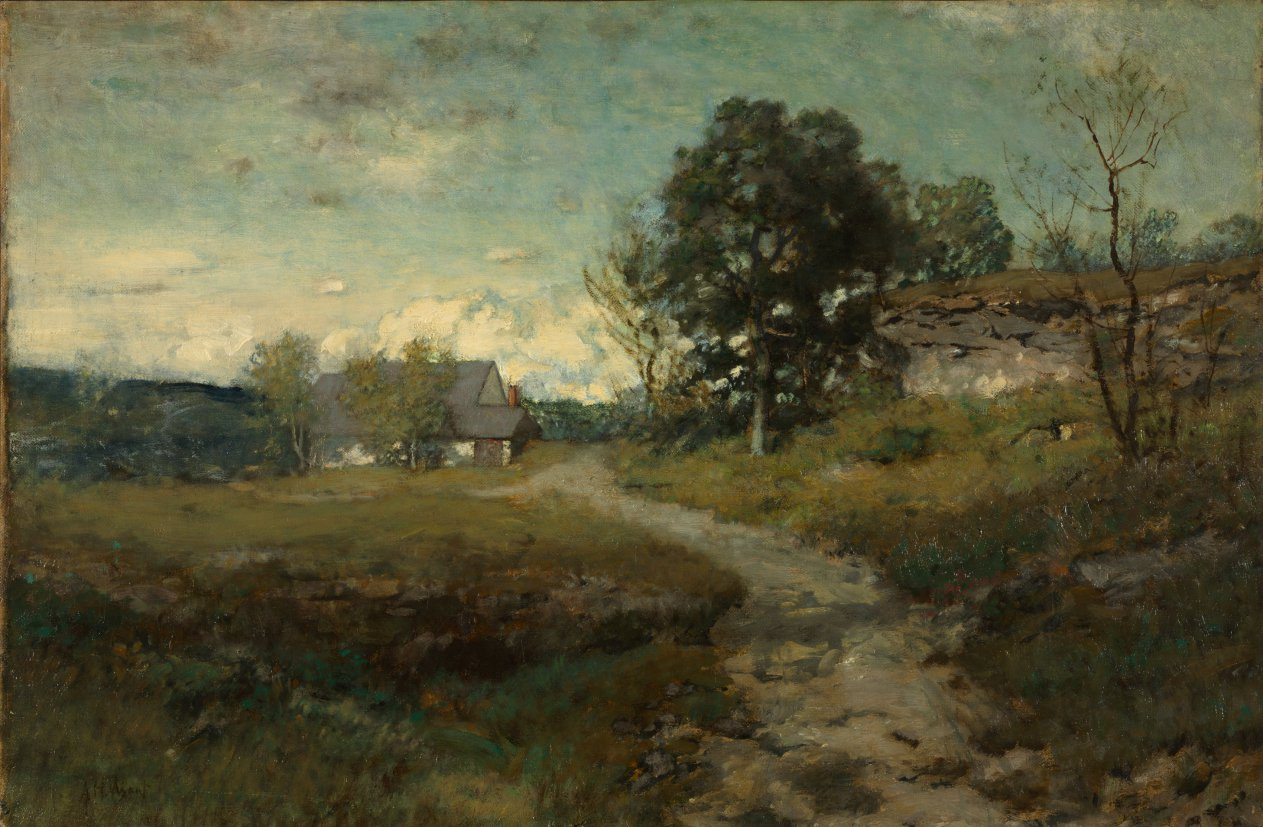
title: Arkville Landscape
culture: America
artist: Alexander H. Wyant (American, 1836–1892)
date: 1880s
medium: oil on canvas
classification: Painting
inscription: Signed lower left: "A.H. Wyant"